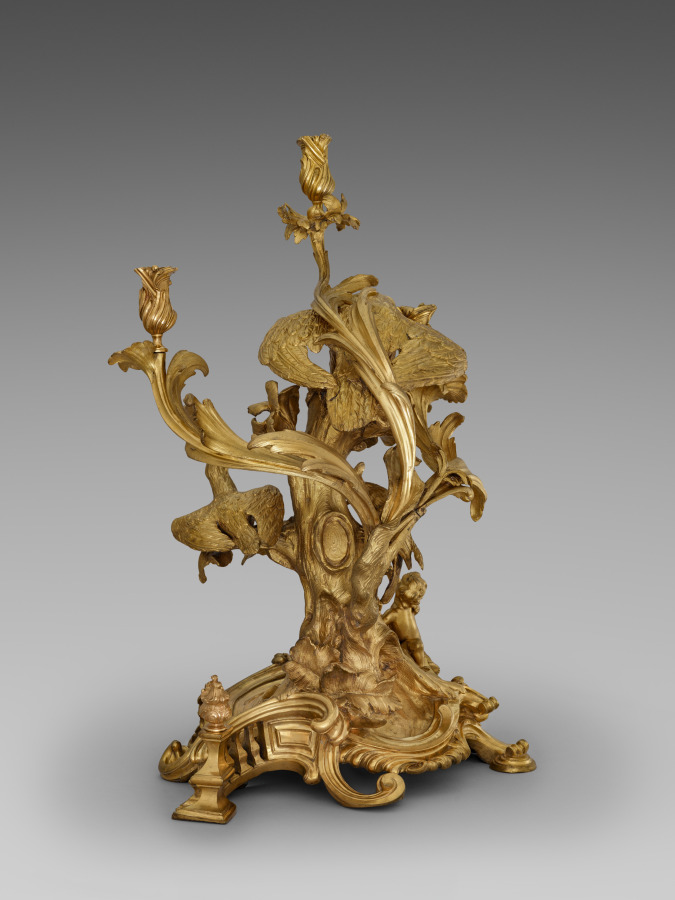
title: Candelabrum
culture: France, 18th century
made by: probably by Jean Joseph de Saint-Germain (French, 1720–1791)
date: c. 1750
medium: gilt bronze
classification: Furniture and woodwork